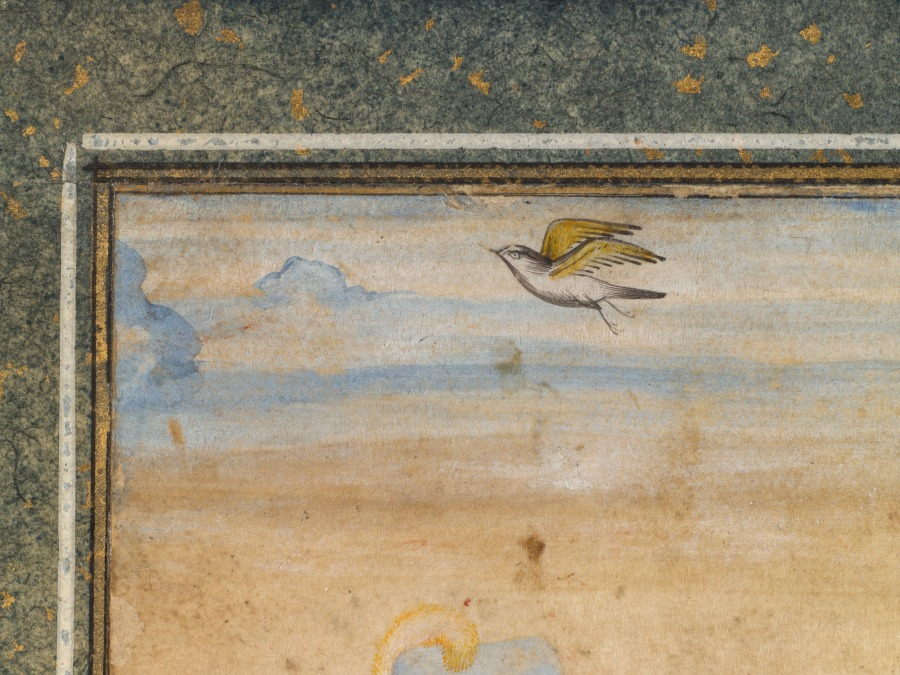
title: A European Couple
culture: India, Bijapur, Deccan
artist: attributed to Ali Riza, the "Bodleian Painter" (Indian)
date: c. 1610–27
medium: Gum tempera and gold on paper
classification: Painting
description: This painting of a European couple seems to be based on close observation and a desire to record the appearance of foreigners. The artist has accurately depicted the 17th-century European clothing in great detail, particularly in the collar ruffs, linen cuffs, and ornate jewelry worn by both figures.